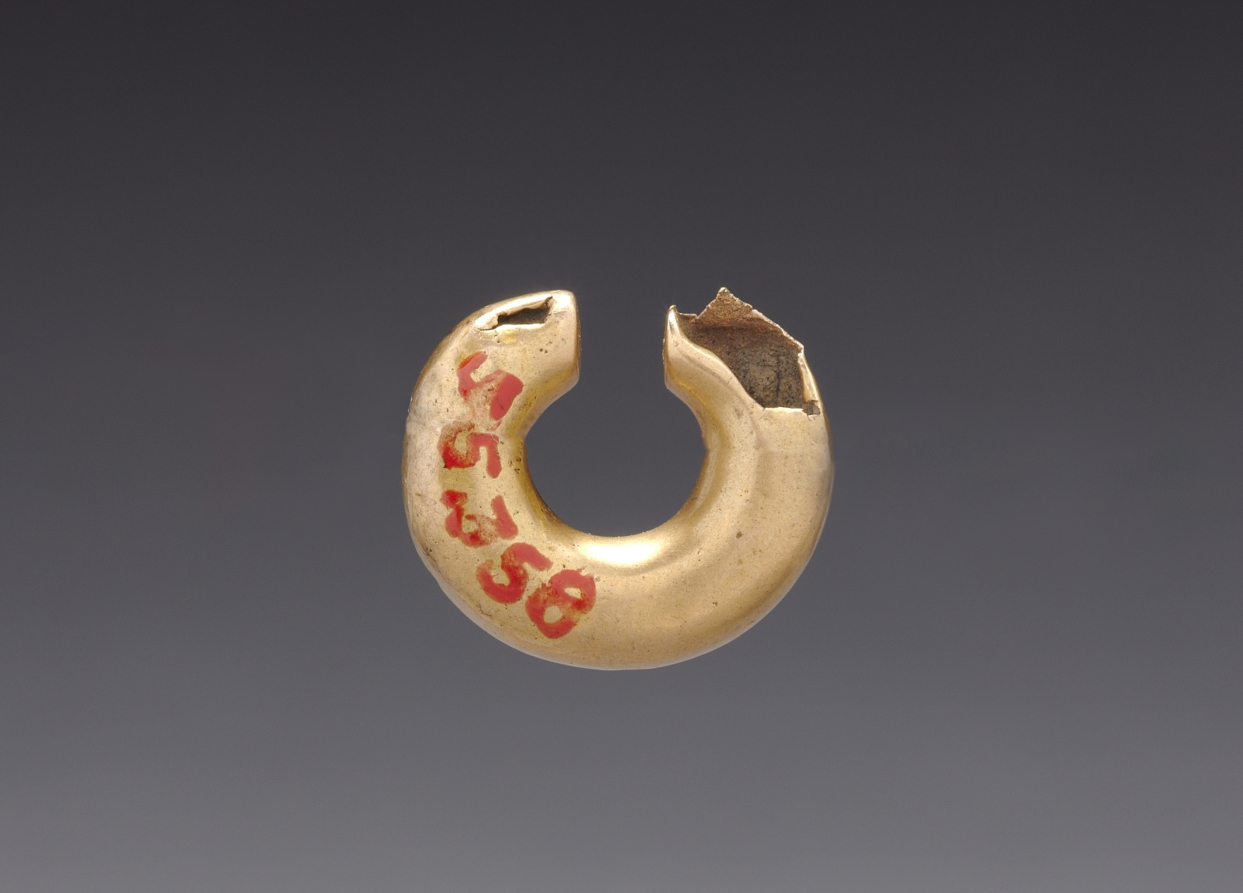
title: Nose Ring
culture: Colombia, Quimbaya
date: before 1550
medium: gold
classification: Jewelry